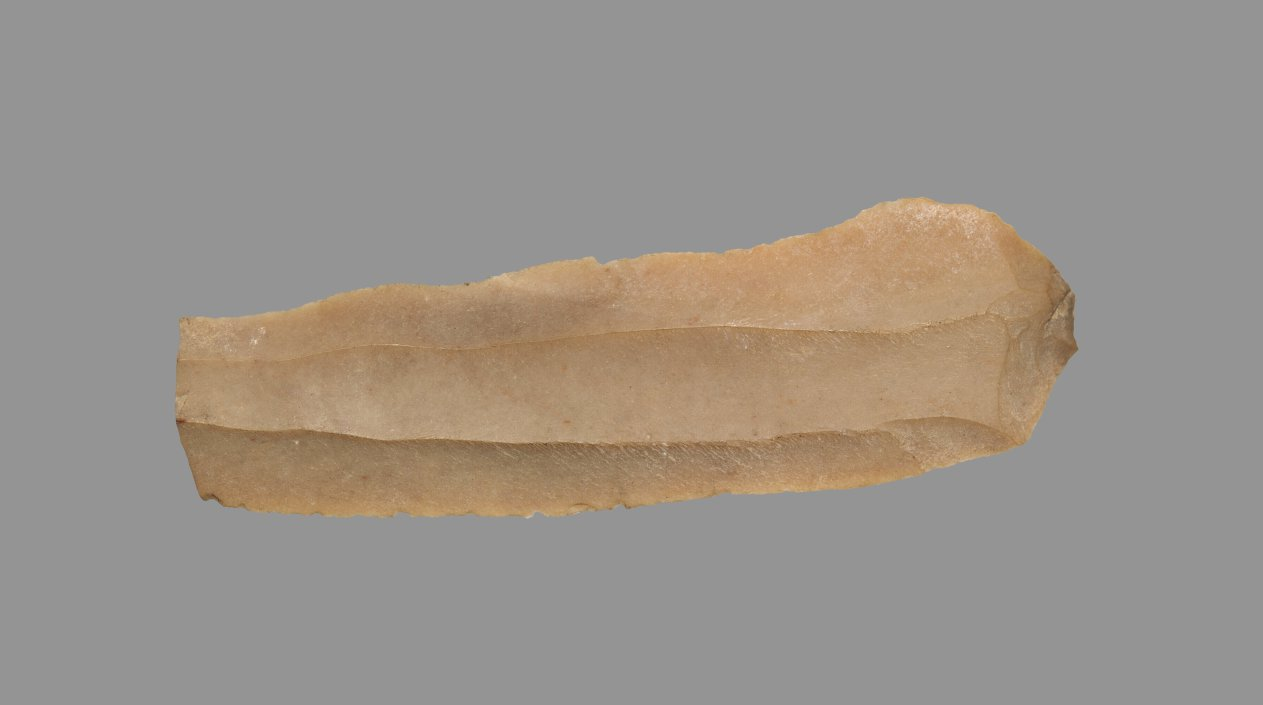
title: Sickle Blade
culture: Egypt, Middle Kingdom (2040–1648 BCE), Dynasty 12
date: 1980–1801 BCE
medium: flint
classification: Implements